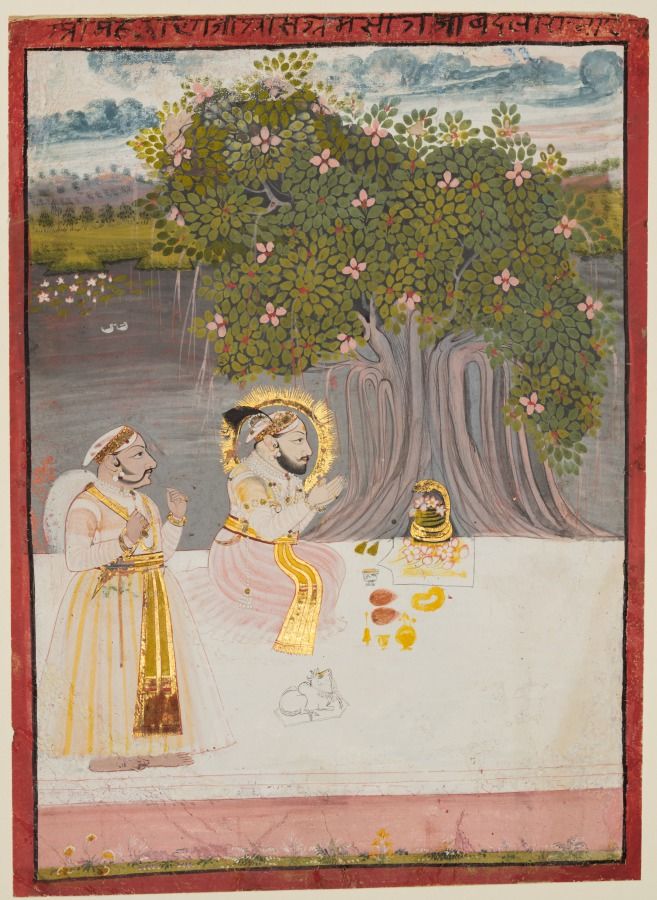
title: Maharana Sangram Singh II (r. 1710–34) Worshipping a Linga Under a Banyan Tree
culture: Northwestern India, Rajasthan, Rajput Kingdom of Mewar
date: c. 1712–15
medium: Gum tempera, ink, and gold on paper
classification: Painting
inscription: śrī mahāranā jī śri sangram sīgha jī badalā rābhāe (?)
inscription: 18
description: Shrines alongside bodies of water were associated with serpent deities. A four-headed snake painted gold is wrapped around the linga (the phallic emblem marking the sacred presence of the god Shiva). Facing the linga is a marble image of Shiva’s mount, the bull Nandi. Flowers, packets of paan (areca nut and sweet aromatics wrapped in betel leaf), coconuts, and a flower garland are among the offerings. A brass ewer holds purified water, and a bell would punctuate moments of recitation. A blue-and-white porcelain cup holds the fragrant yellow paste to be applied to the linga and the forehead of the pious king.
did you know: A miniature sculpture of Nandi, the bull mount of Shiva, is next to the king on the terrace.